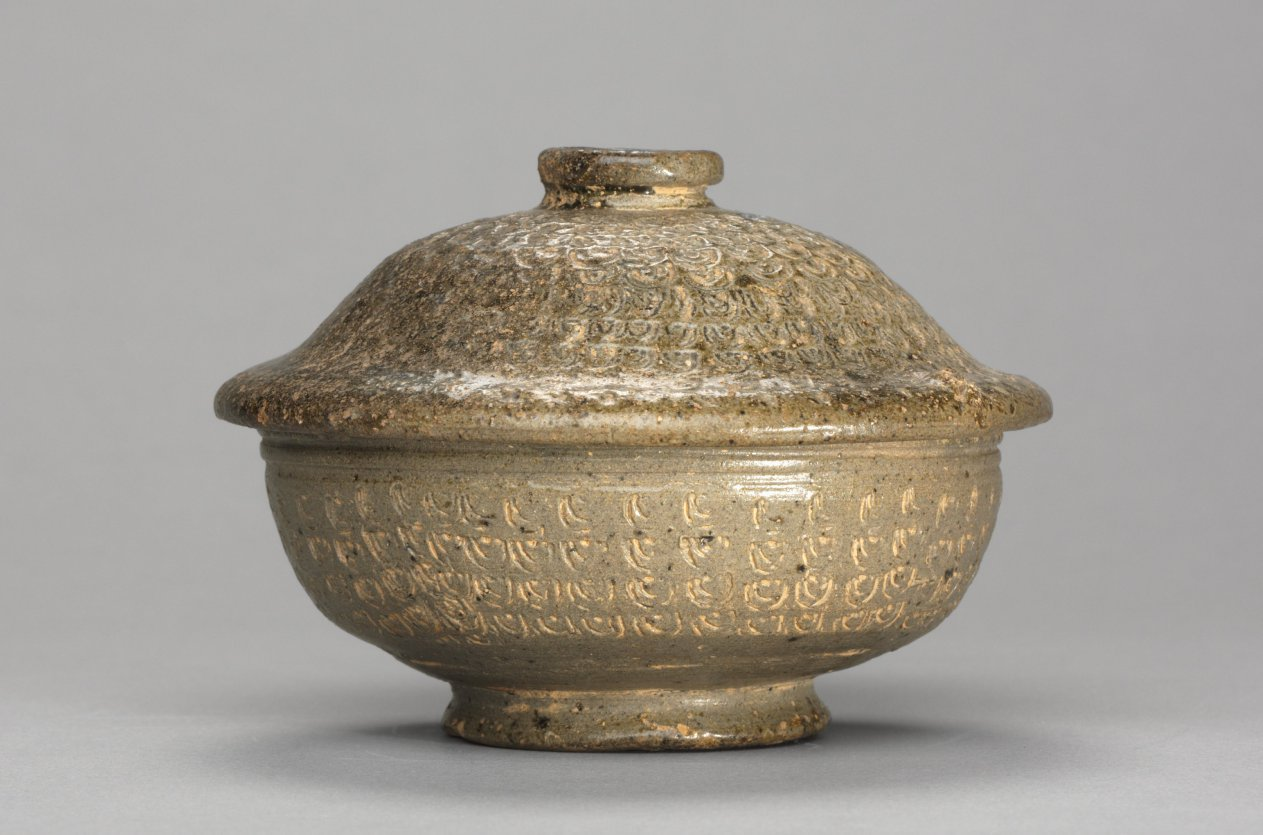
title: Burial Urn with Stamped Design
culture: Korea, Unified Silla period (676-935)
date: 500s–600s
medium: stoneware with stamped designs under olive-green glaze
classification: Ceramic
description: After the introduction of Buddhism, cremation became a common practice in Korea. This jar, which once contained the remains of the dead, may have nested in a larger stone container. The repetitive patterns that appear on the lid and the container was done with a stamping technique.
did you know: Containing the remains of the dead, this type of ancient clay pottery was excavated from tombs.